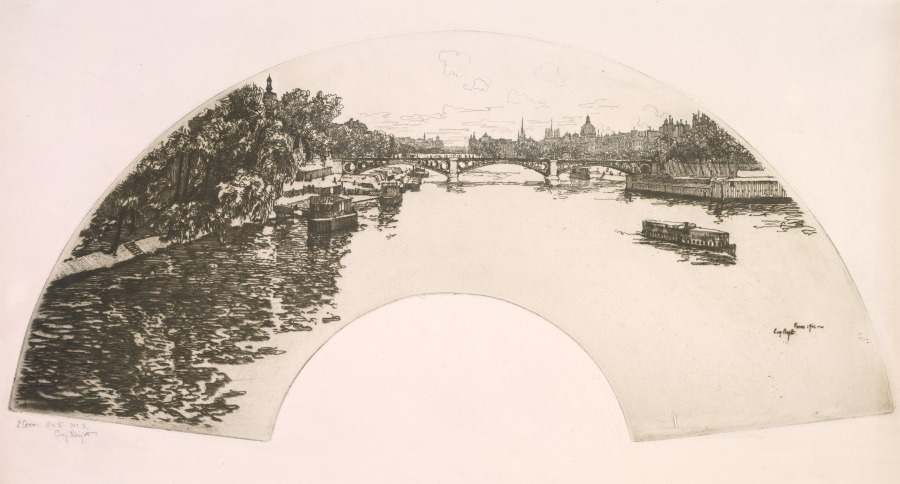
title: Fan, The Seine seen from the Pont Royal (Éventail, La Seine vue du Pont Royal)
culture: France, 20th century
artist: Eugène Bejot (French, 1867–1931)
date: 1901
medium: etching printed in olive green ink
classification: Print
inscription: Lower left margin, in graphite: 2. Etat. T a 5 ? 3. / Eug Bejot